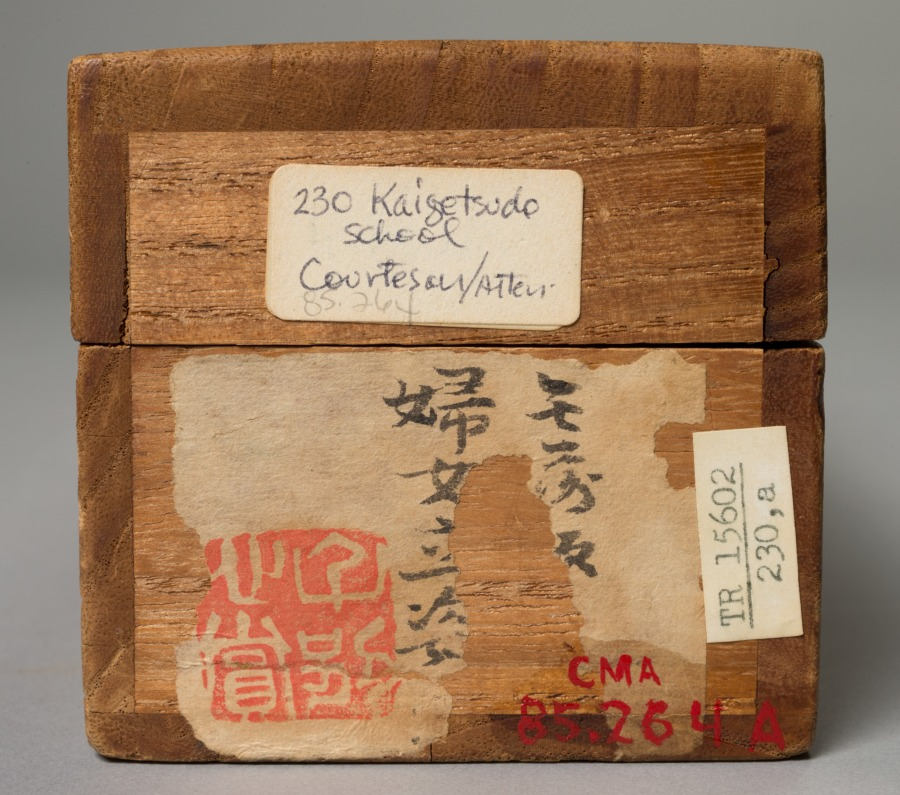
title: Courtesan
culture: Japan, Edo period (1615–1868)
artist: studio of Kaigetsudō Ando (Japanese, c. 1671–1743)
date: 1700s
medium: hanging scroll; ink and color paper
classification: Painting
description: Paintings of the courtesans who provided men with a sophisticated menu of appealing fashions, flattery, witty banter, music, dancing, and sexual services in the Yoshiwara district of the city of Edo (Tokyo) were the bread and butter of the Kaigetsudō studio, in whose style this work is painted. Their paintings emphasized bold, sweeping calligraphic ink lines in rendering the figures’ forms, along with high-contrast colors and patterns in their typically solitary subjects’ garments. Aside from the occasional prop or poem, the space around the dramatic figure was left entirely blank.